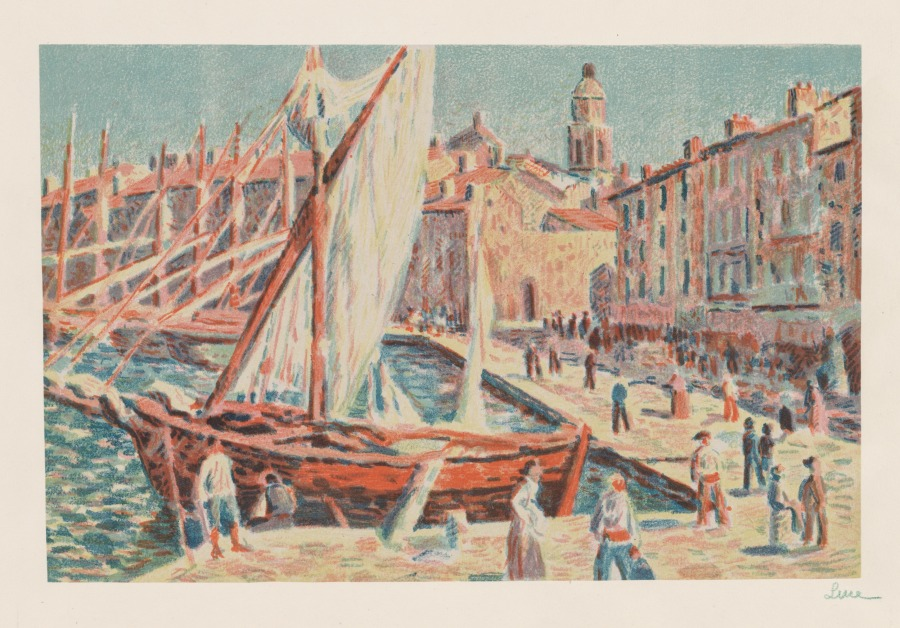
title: Saint-Tropez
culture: France, 19th century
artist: Maximilien Luce (French, 1858–1941)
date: 1897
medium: color lithograph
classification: Print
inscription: signed in green crayon, lower right and numbered "no. 36", lower right in pencil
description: This is a brilliant impression of Luce's most important color lithograph, which exemplifies the ideas of his close friend and fellow artist Paul Signac (1863–1935): that optical effects of color are achieved by the juxtaposition of touches of pure pigment. In his paintings, Luce used brushstrokes rather than the pointillist dots of color favored by painters such as Georges Seurat (1859–1891). When using lithography Luce placed dashes of different colors side by side so that they would interact, achieving a rich glow of color.